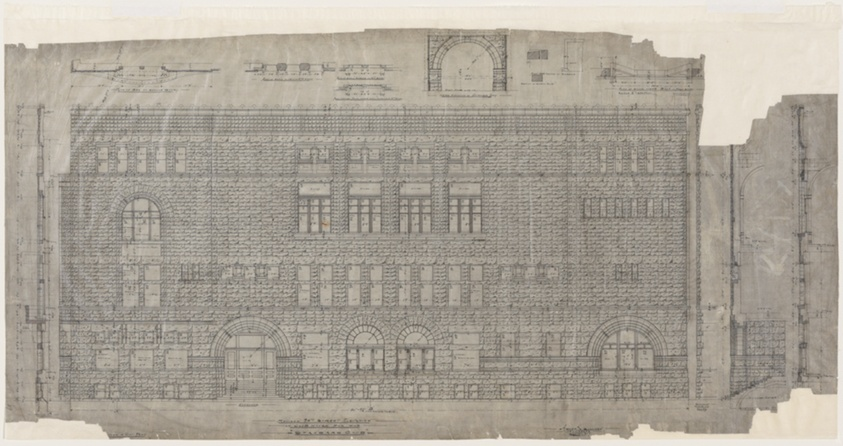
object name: Architectural Drawing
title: Revised 24th Street Elevation for Standard Club, Chicago, Illinois, Details and Sections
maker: Adler & Sullivan, Architects (American, 1883-1895)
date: 09/19/1887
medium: Graphite and ink on linen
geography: Michigan Avenue at 24th Street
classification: architectural working drawing; architectural drawing; architecture